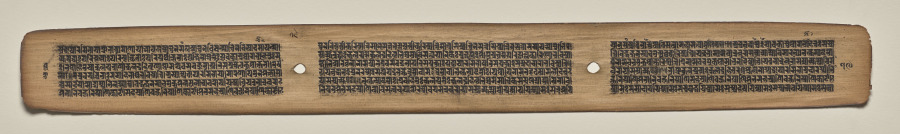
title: Text, Folio 79 (verso), from a Manuscript of the Perfection of Wisdom in Eight Thousand Lines (Ashtasahasrika Prajnaparamita-sutra)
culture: Eastern India, Bihar, Vikramashila Monastery. Painting: Nepal, Kathmandu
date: Sunday, September 14, 1119 (year 239 of the Newar Samvat in the month of Ashvina)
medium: gum tempera and ink on palm leaves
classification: Painting